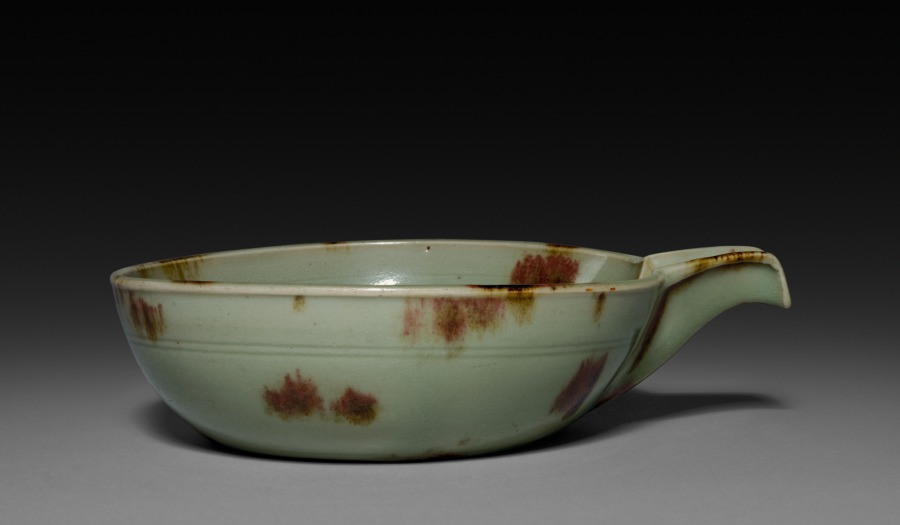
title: Spouted Bowl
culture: China, Zhejiang province, Longquan region, Yuan dynasty (1271-1368)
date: 1300s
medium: Celadon-glazed stoneware spotted with copper red, Longquan ware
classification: Ceramic